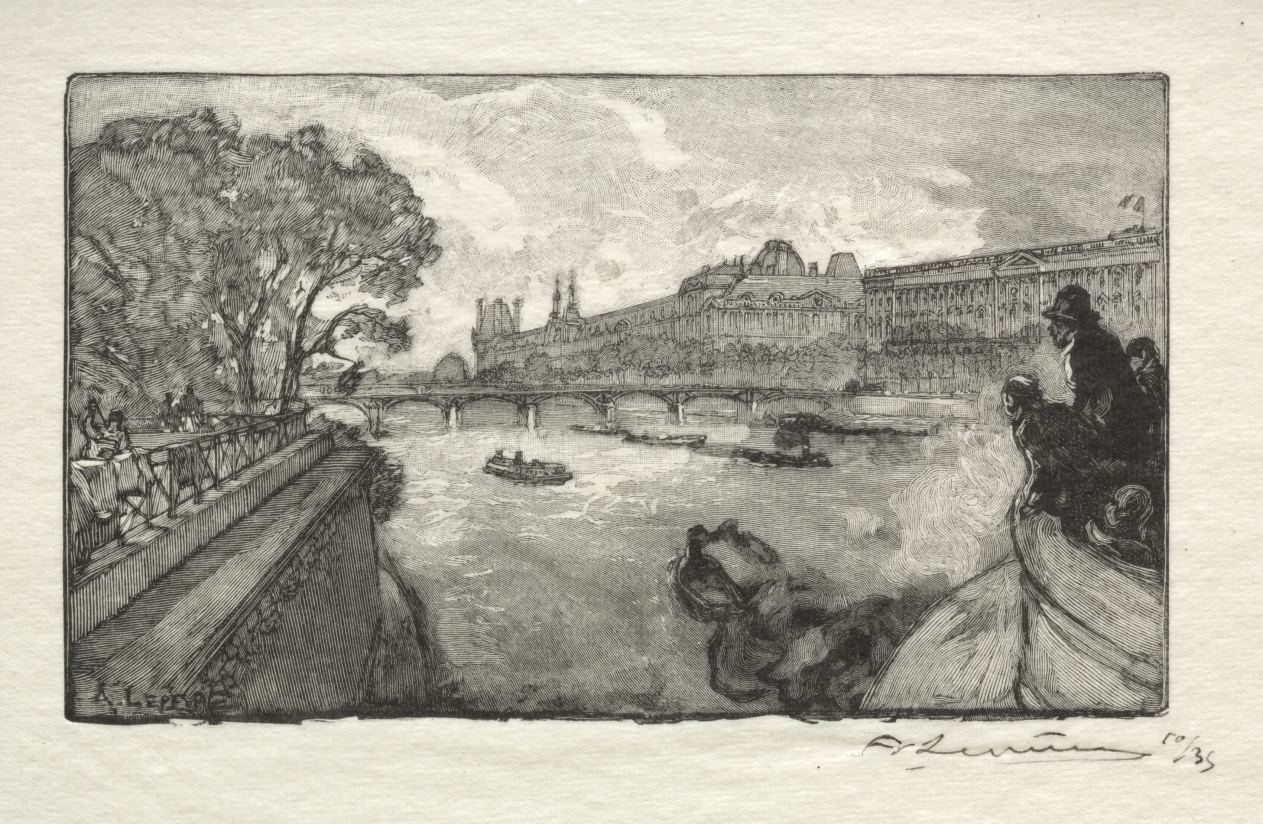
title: Le Louvre, vu du Pont Neuf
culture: France, 19th century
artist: Auguste Louis Lepère (French, 1849–1918)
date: 1890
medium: wood engraving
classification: Print